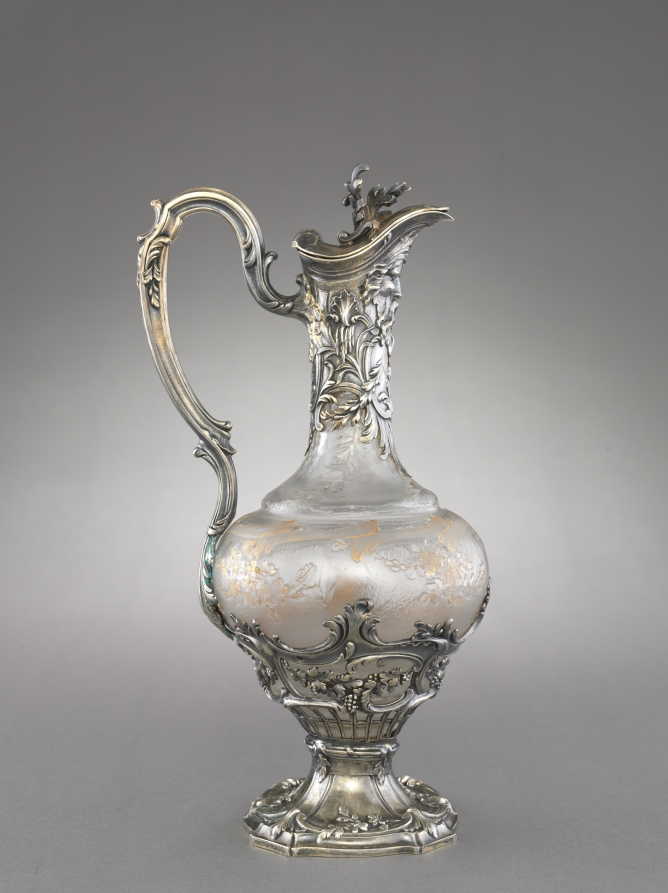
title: Wine Ewer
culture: France, 19th century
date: c. 1850–70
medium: glass with silver gilt mounts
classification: Silver